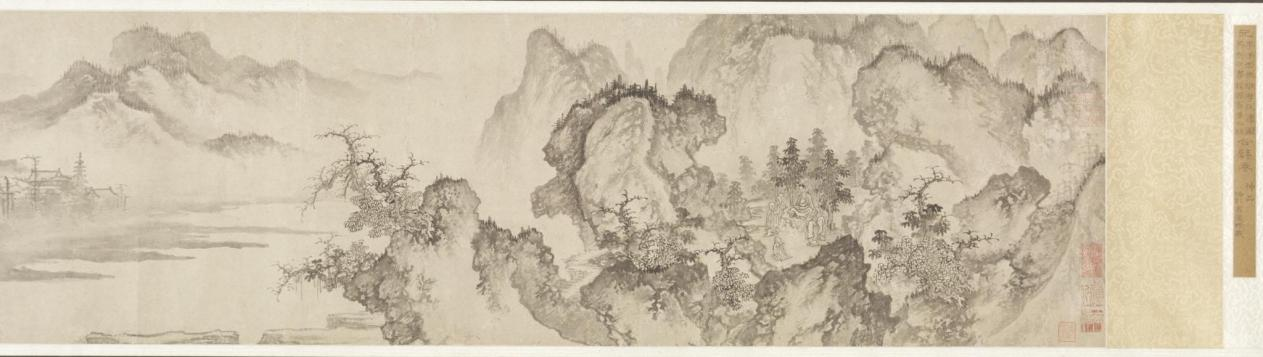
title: Buddha's Conversion of Five Bhiksu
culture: China, Yuan dynasty (1271–1368)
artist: Li Sheng (Chinese, active c. 1324–after 1375)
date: mid-1300s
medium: handscroll; ink on paper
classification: Painting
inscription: 紫篔生李升識 [印] 李氏子雲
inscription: 4 colophons and 12 additional seals: The "Heart" Sutra (Maha Prajnaparamita) text written by Wu Yuqing 吳餘慶 (active early 1400s); 2 seals of Xu Qianxue 徐乾學 (1631–1694); 3 colophons, one dated 1929 and two dated 1936, and 9 seals of Wu Hufan 吳湖帆 (1894–1968); 1 colophon, dated 1932, of Chen Dingshan; 1 seal unidentified.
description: This episode stems from the life of the historical Buddha, who, after his enlightenment, was initially hesitant about preaching his own doctrine. After much personal deliberation and prodding by deities, he finally relented. The first converts were the five guards who served him when he was still a prince. For Li Sheng, this is the pretext of the painting, which moves from the interaction of the bhiksu with the Buddha to a broader awareness of the vast surroundings of the scene.